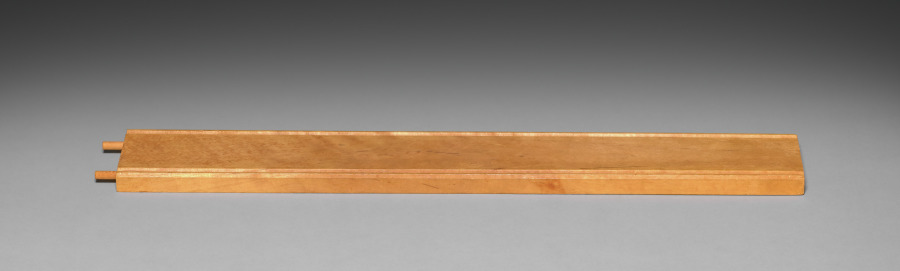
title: Train Track Section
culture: Denmark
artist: Boysen Toys (Danish)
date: 1900s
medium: wood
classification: Wood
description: Credit line: John D. Rockefeller General Education Board Grant II